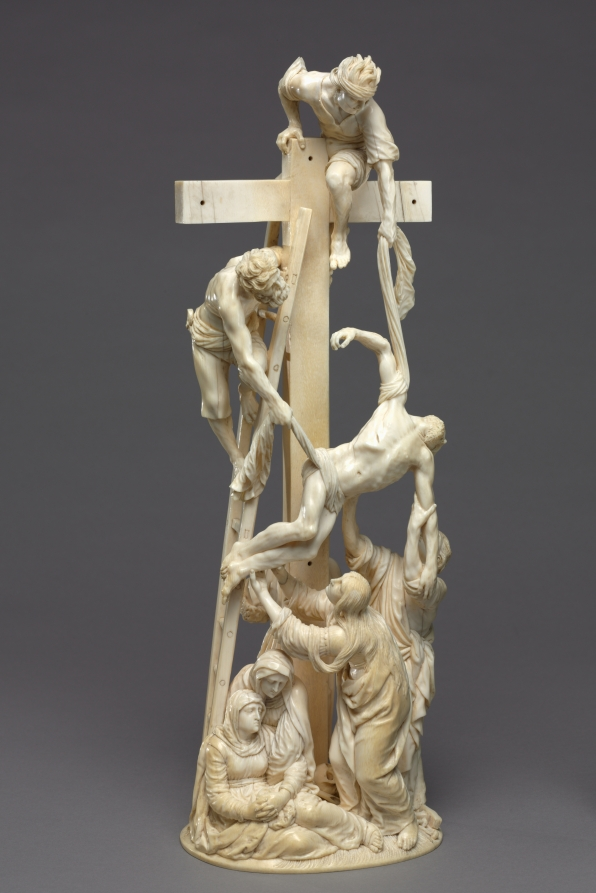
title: Descent from the Cross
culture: Austria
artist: Adam Lenckhardt (German, 1610–1661)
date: 1653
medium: ivory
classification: Sculpture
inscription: inscribed with monogram "AL" conjoined and dated 1653.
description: Carved from a single piece of ivory for Prince Karl Eusebius von Liechtenstein of Vienna, this work is a true tour-de-force. It took Lenckhardt seven years to complete; it is his last known sculpture and the pinnacle of his career. The biblical accounts of the descent from the cross found in the gospels are not consistent, which may contribute to the difficulty in precisely identifying the figures. The Virgin Mary, Saint John, Mary Magdalene, and others were said to be present, but undoubtedly there are other disciples here mourning Christ’s death. The intense emotion registers on the faces of the figures in the scrupulous and exquisitely detailed work.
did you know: Carved from a single elephant tusk, the artist took special care to ensure the ivory did not crack or break as he meticulously crafted each figure in this visually exciting sculpture. Look closely to find tools and small objects included near its base.